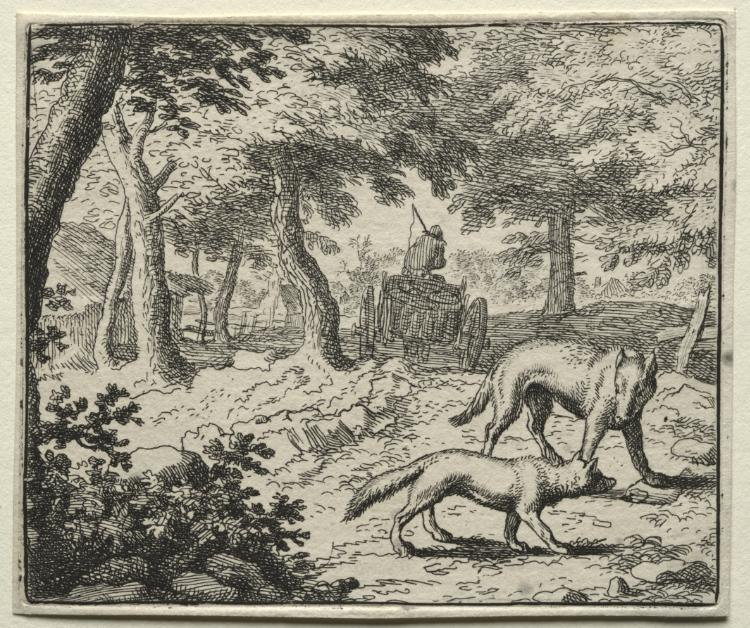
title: Reynard the Fox: The Badger's Defense of Reynard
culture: Netherlands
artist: Allart van Everdingen (Dutch, 1621–1675)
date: 1650–75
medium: etching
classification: Print